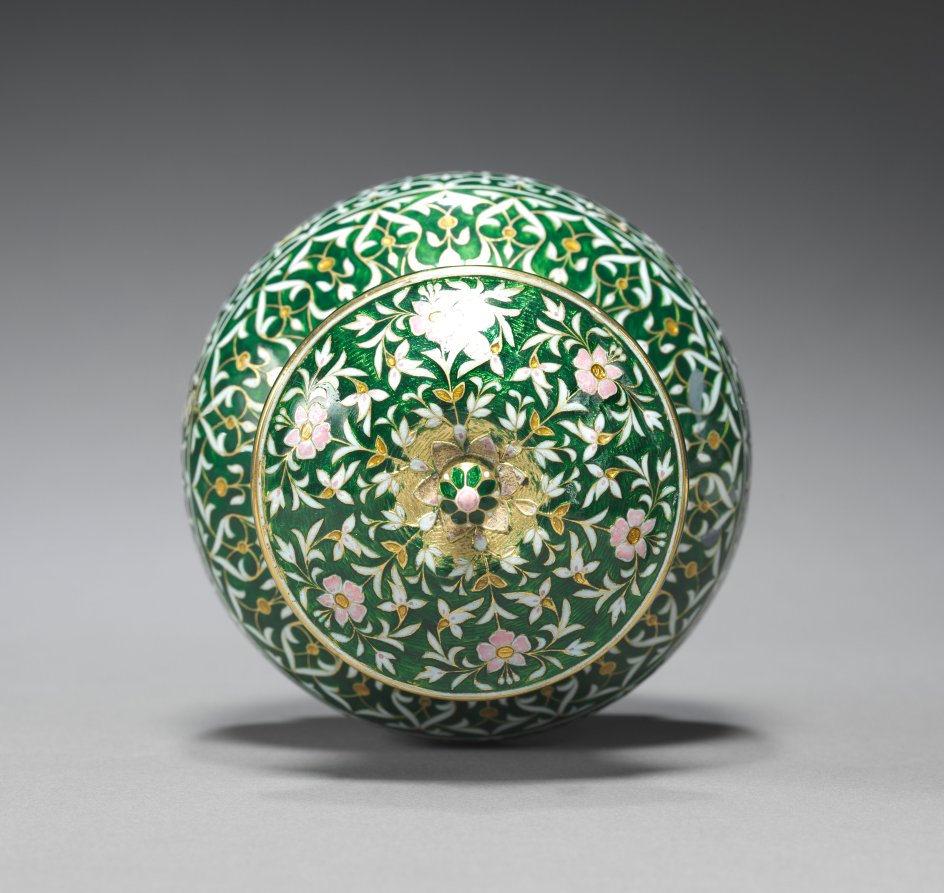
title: Lota: Covered Jar on Narrow Foot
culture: India, Jaipur, late 17th-early 18th Century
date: c. 1700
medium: cloisonne enamel on gold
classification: Enamel